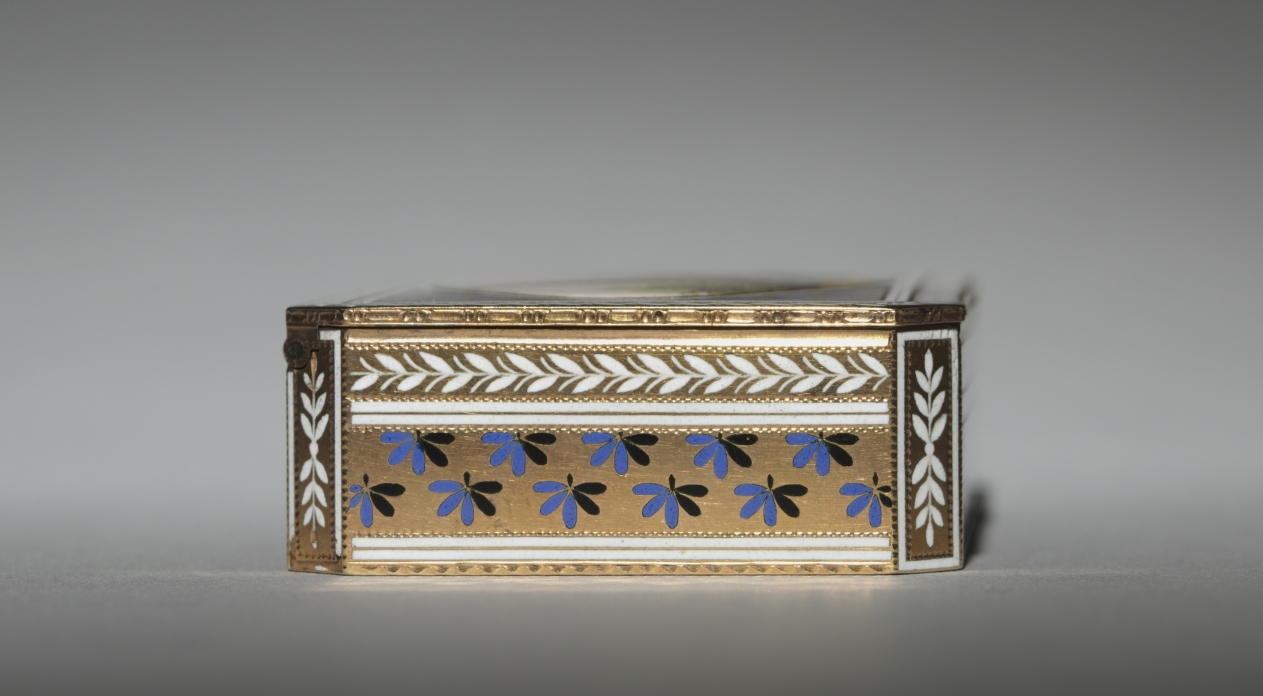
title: Box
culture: Switzerland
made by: probably by F. Joanin (Swiss)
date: c. 1810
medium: gold and enamel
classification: Miscellaneous